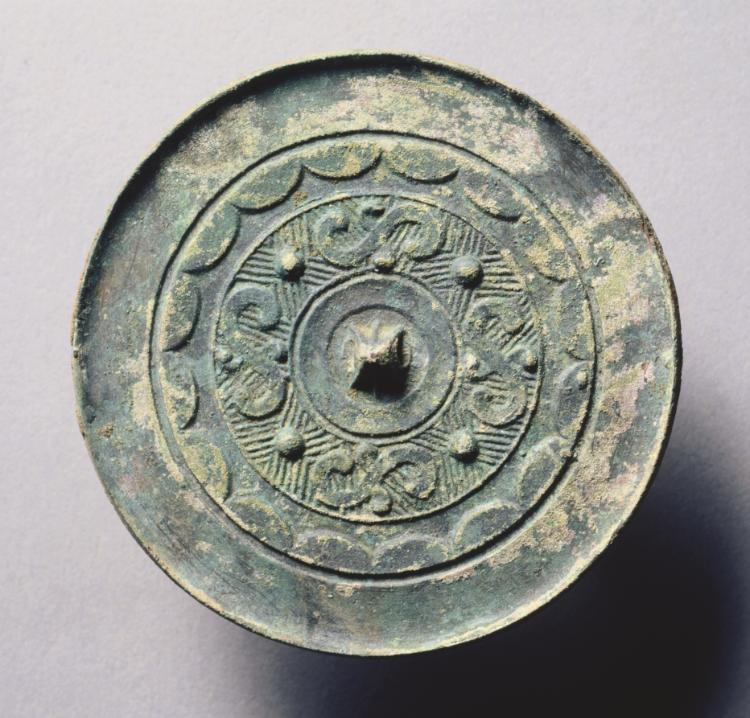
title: Mirror with Four Dragons Pattern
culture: China, Eastern Zhou dynasty (770–256 BCE), Warring States period (475–221 BCE)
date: 500–200 BCE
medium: bronze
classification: Metalwork